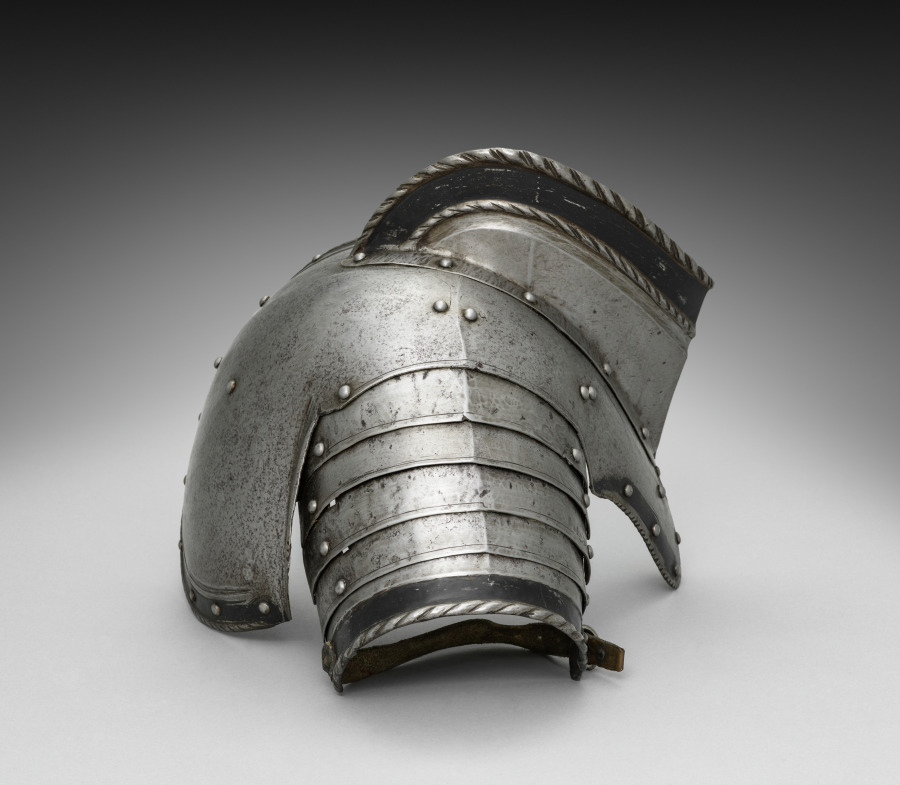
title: Right Pauldron with Guard Brace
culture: Germany, 19th century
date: 1801–1900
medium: steel with black paint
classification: Arms and Armor